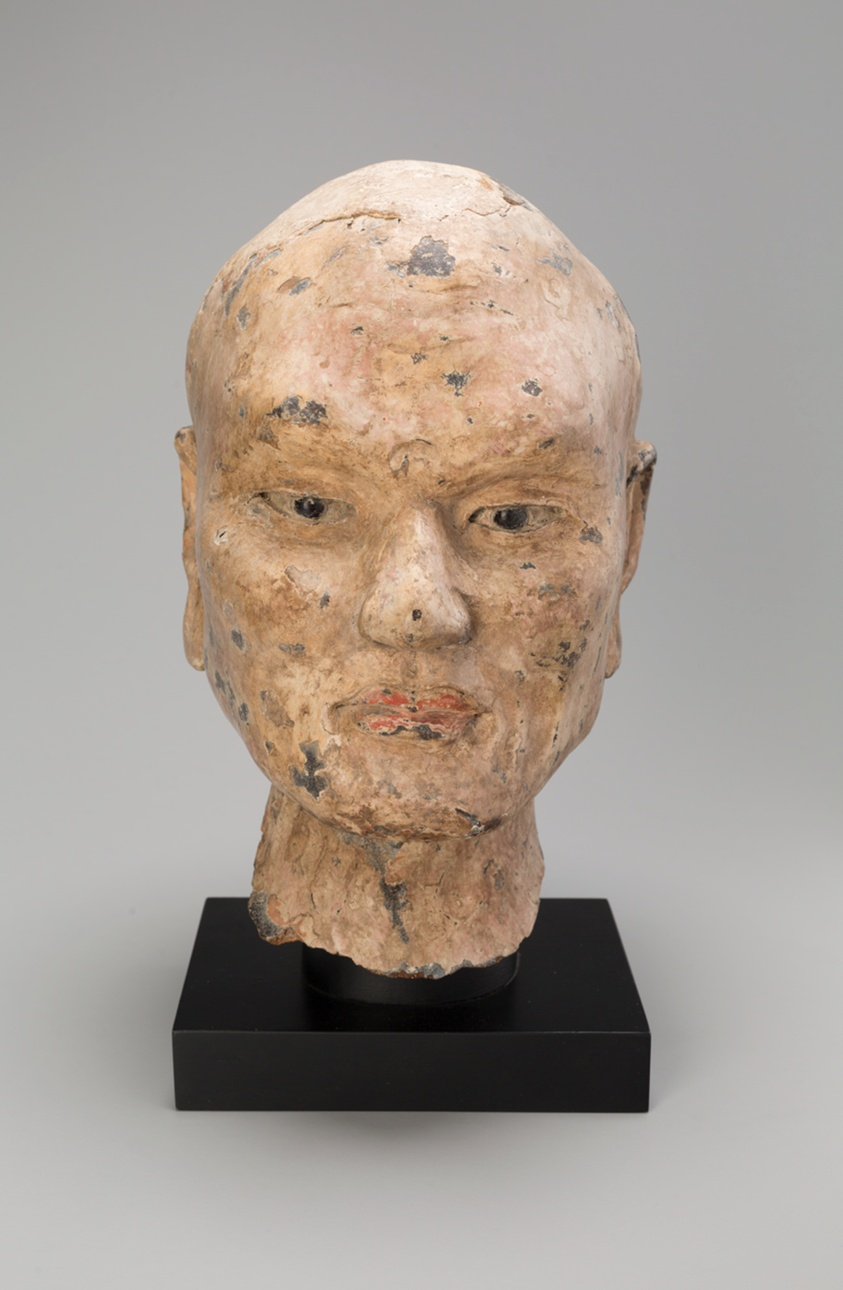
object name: Sculpture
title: Head of Luohan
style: Chinese (culture or style)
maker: China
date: Northern Song, Liao, or Jin dynasty, c. 11th century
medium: Hollow dry lacquer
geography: China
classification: lacquer; sculpture; asian art